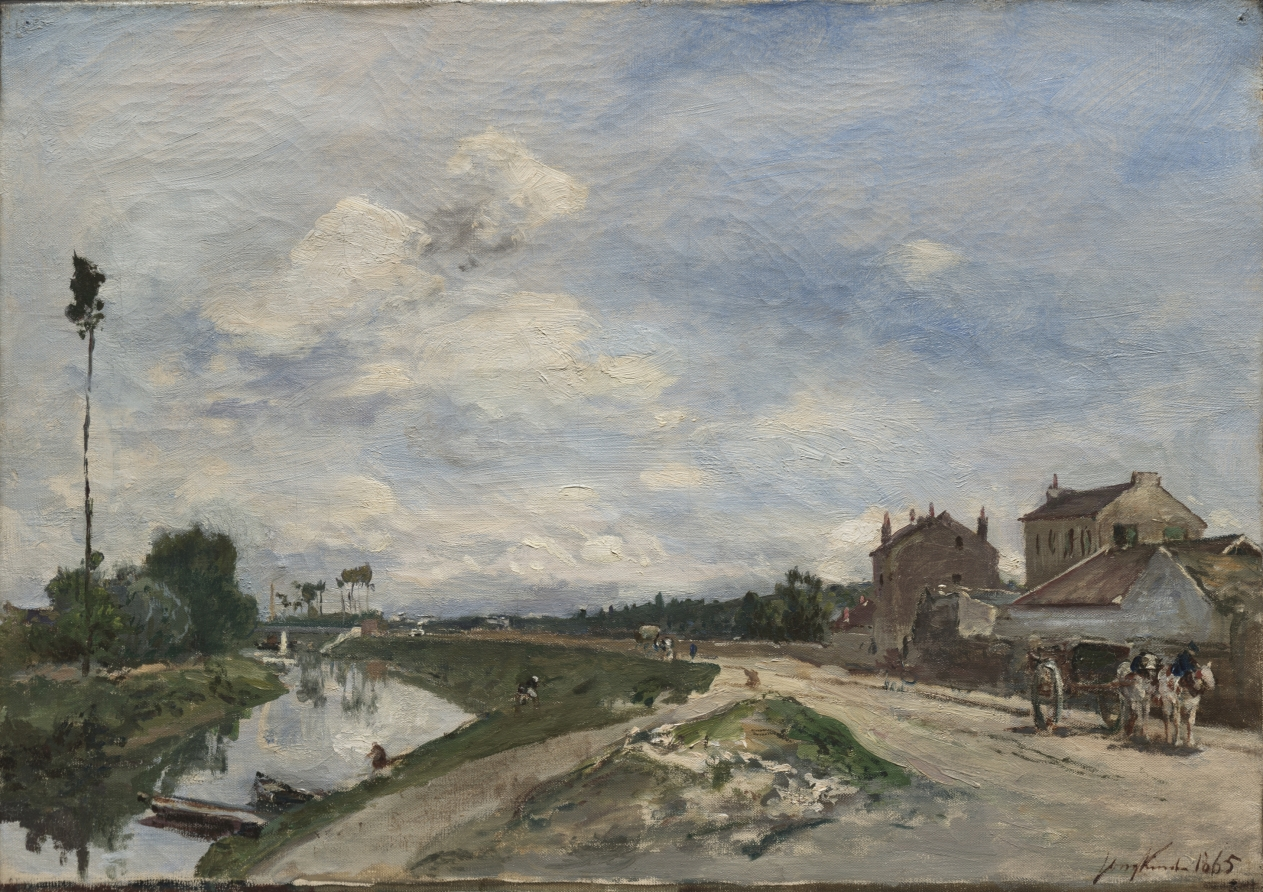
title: The Seine at Bas-Meudon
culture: France, 19th century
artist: Johan Barthold Jongkind (Dutch, 1819–1891)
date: 1865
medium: oil on fabric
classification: Painting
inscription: Signed lower right: Jongkind 1865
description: Although born and trained in Holland, Jongkind spent much of his life painting outdoors in France. In this depiction of Bas-Meudon near Paris, the artist applied paint in small patches of bright color to suggest the intensity of outdoor light. Although typcially finished in the studio from open-air sketches, Jongkind's oil paintings achieve a convincing immediacy that greatly impressed the young Claude Monet. The two met in the early 1860s and spent part of a summer painting together along the coast of Normandy. "From that time he was my real master," Monet later acknowledged, "it was to him that I owe the final education of my eye."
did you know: Fellow artist Edouard Manet considered Jongkind the "father of modern landscape painting."